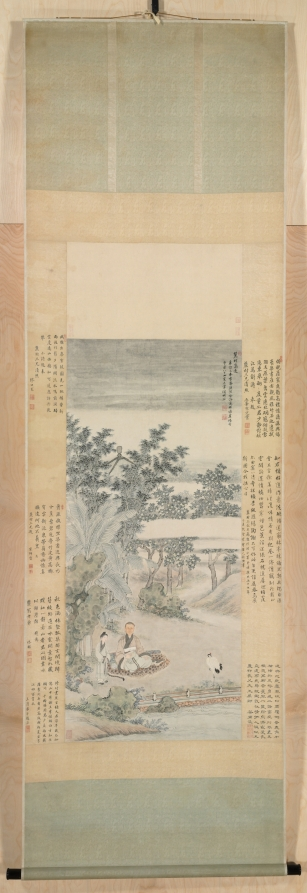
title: Portrait of An Qi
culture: China, Qing dynasty (1644-1911)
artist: Wang Hui (Chinese, 1632–1717)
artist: Tu Luo (Chinese, active c. 1715)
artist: Yang Jin (Chinese, 1644–1728)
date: 1715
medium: hanging scroll; ink and color on paper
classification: Painting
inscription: [印]上下千年. 麓村高逸：康煕乙未季春，廣陵涂洛寫照，海虞楊晉布景，八十四叟王翬補竹石。[印]耕煙; 王翬之印.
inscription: 俯視塵寰逸韻高，襟懷潚灑興偏豪。/ 琴書座右親風雅，竹石池邊拭羽毛。/ 蕉葉亂雲遮北礀，鶴翎凝雪戀東皋。/ 翩翩度量如君少，靜對秋江萬斛濤。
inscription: 知君頗好道，作意洗緐縟。/ 遂窮林亭勝，翛然契幽獨。/ 自得會忘言，餘善時往復。/ 岸幘若有期，把卷一停讀。/ 鶴馴行載正，雲閑斷還續。/ 橘柚欎寒煙，芭蕉瀉深綠。/ 石橋逕屢迴，暗水流亦曲。/ 真心恣奇探，曠景縱遐矚。/ 陶謝不可作，此旨更誰屬。/ 眷焉展斯圖，令我怡心目。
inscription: 逸興迥絶塵，風流仰高躅。/ 側無鹿角巾，横呈豹皮褥。/ 胸藏山壑富，座列琴囊足。/ 橙懸萬顆黄，蕉散一叢綠。/ 泉清鶴景長，樹遠雲光續。/ 披圖識性情，伊人温似玉。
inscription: 風雅出塵寰，披圖見一斑。/ 橘香新雨後，竹影夕陽間。/ 流水鳴前澗，歸雲渡遠山。/ 幽棲如可遂，應許共追攀。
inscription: 蕭灑披襟坐，琴書逸興長。/ 衫分蕉葉碧，冠學竹皮黄。/ 高樹穿雲斷，流泉帶菊香。/ 幽懷真曠達，何地不羲皇。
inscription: 秋色滿林壑，孤琴獨玄閒。/ 境歸簪紱外，道在水雲間。/ 棄智如藏璞，栖心静若山。/ 看君此圖畫，永以謝塵顏。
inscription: 修竹叢蕉坐綠天，君容早歳已如仙。/ 山中寄謝王摩詰，頭白方知住輞川。/ 千樹勝封萬戸侯，西風載滿李衡舟。/ 看君高致輕軒冕，坐享江鄉富貴秋。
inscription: 6 seals unidentified.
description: An Qi, the subject of the portrait, was a second-generation salt merchant from Korea. He used part of his wealth to collect art. At the time this painting was commissioned, An was less than 40 years old. He is represented as a Daoist recluse in nature, informally dressed with attributes such as books and a wrapped guqin instrument, a portrait convention for literati-scholars since the Six Dynasties period (220–589 CE). The local Taihu rock, banana plants, and crane suggest a southern garden and a life in seclusion. An’s portrait is evidence of merchants aspiring to the scholar-official class. According to the inscription, this painting was the joint effort of three men, the eldest and most famous was Wang Hui. While the garden setting is homogenous in style, it contrasts with the application of opaque pigments and shading employed for the depiction of An Qi’s face.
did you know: Seven of An Qi's close friends wrote poetic inscriptions on the silk brocade mount around his portrait.